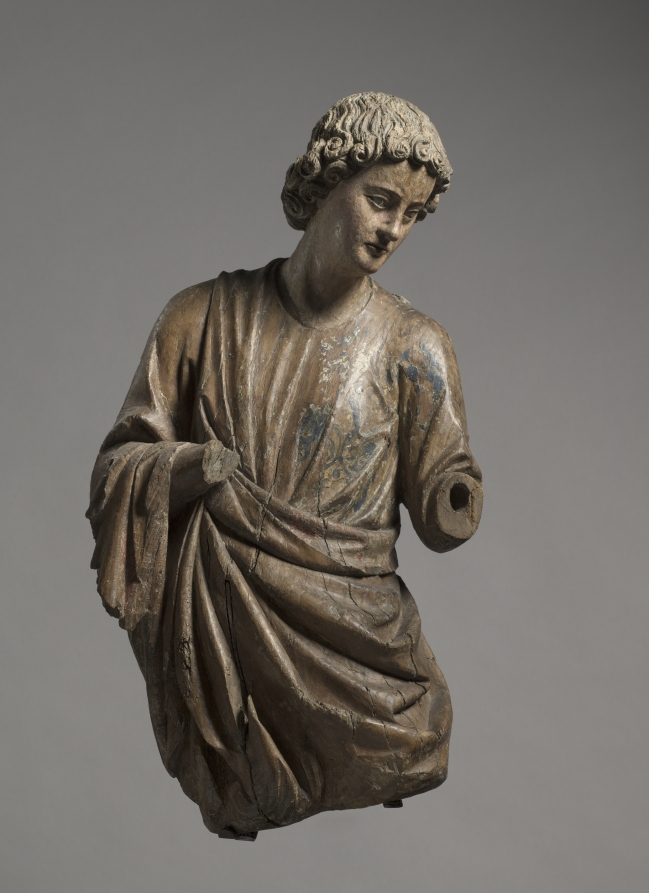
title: Angel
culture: France, vicinity of Reims, 13th century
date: c. 1250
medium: walnut with traces of gilding and polychromy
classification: Sculpture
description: Surviving in fragmentary condition, this pair of angels lacks lower arms, hands, wings, and attributes. Their original paint and gilding, now almost entirely lost, once rendered their garments a rich brocade and their hair a luxuriant gold. Nonetheless, in their graceful poses and sublime faces—which may portray tragic interest, anguish, or deep concern—their original delicacy and power are still evident. They embody the monumental style of 13th-century High Gothic cathedral sculpture in France. Their style specifically suggests they were carved in or around Reims, possibly by sculptors associated with the cathedral there. Their original placement is unknown, but they may have flanked an altar on columns.